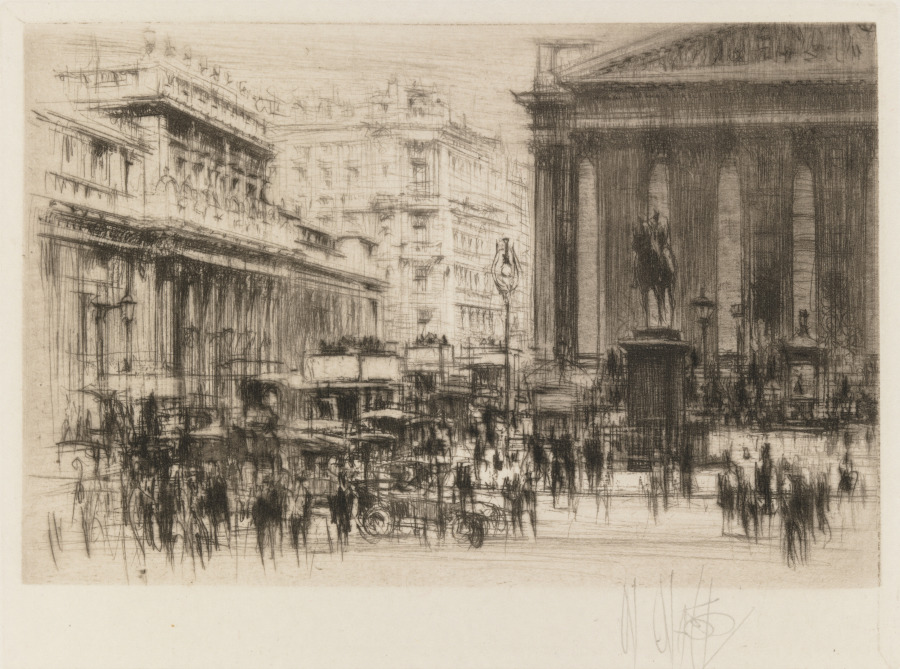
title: London Set: Bank (with the Royal Exchange)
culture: Britain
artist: William Walcot (British, 1874–1943)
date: 1924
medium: etching on wove paper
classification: Print